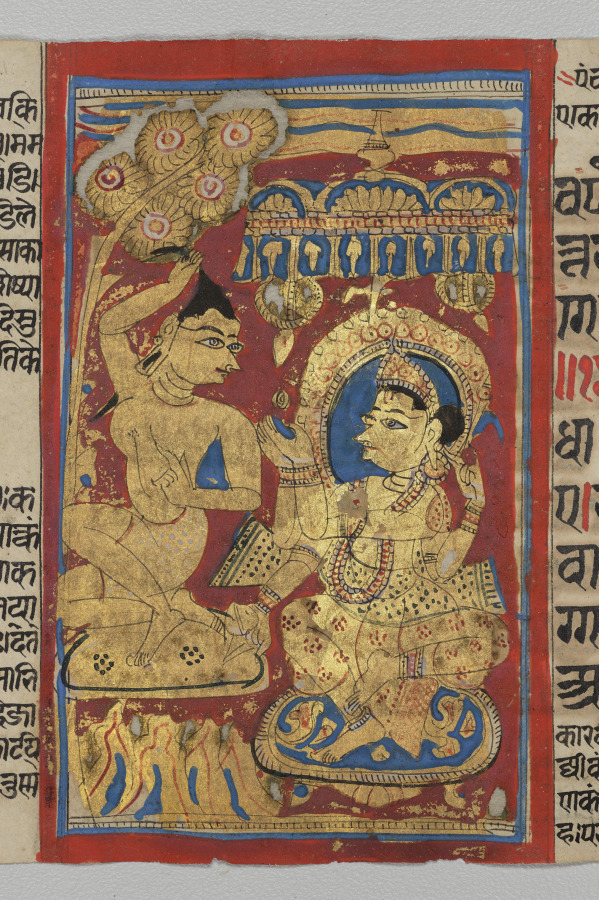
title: Mahavira's Initiation Tonsure, Folio 37 (verso), from a Kalpa-sutra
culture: Western India, Gujarat, last quarter of the 15th century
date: c. 1475–1500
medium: Gum tempera, ink, and gold on paper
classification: Painting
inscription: [[upper left]] Śrī Ma* dīkśā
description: When Mahavira chose to renounce his life as a prince to seek omniscience and ultimate liberation, he traveled from his palace to the countryside until he came to a wooded park. The text states that under an ashoka tree in the park, Mahavira removed his ornaments and garlands and plucked out his hair with his fists in five handfuls. In the illumination he unflinchingly grasps a fistful of hair, his pectoral muscle flexed with the effort. Indra, the four-armed king of the gods, sits under a royal canopy on a lower level than Mahavira and praises his extreme act of self-mortification. The dramatic moment is effectively conveyed through the pert and wiry line drawing and bold palette of pigments made from lapis lazuli, vermilion, and lavish amounts of gold.